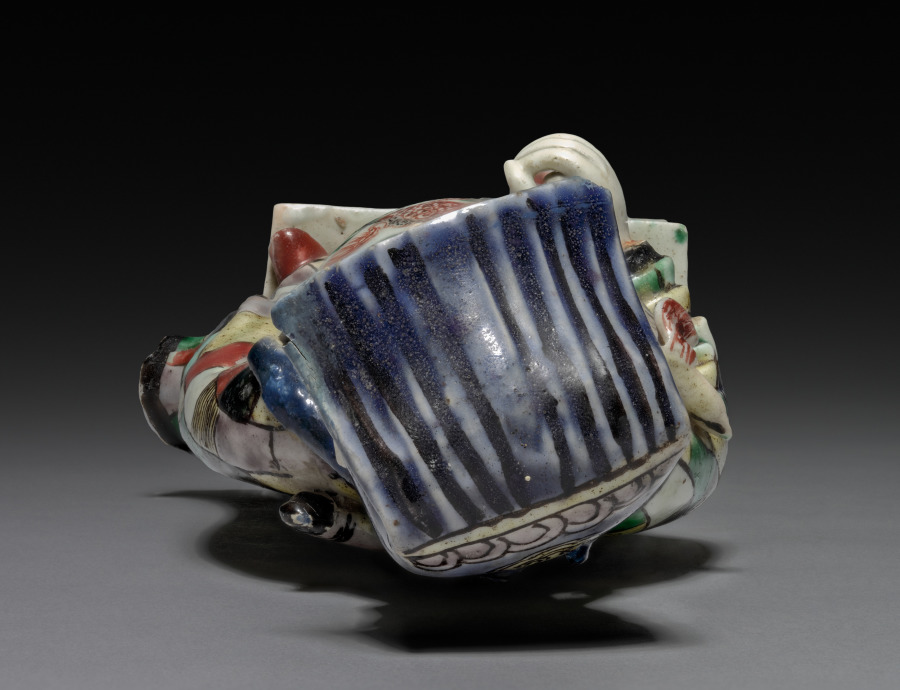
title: Daoist Immortal Zhongli Quan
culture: China, Jiangxi province, Jingdezhen kilns, Qing dynasty (1644-1911), Kangxi reign (1662-1722)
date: 1662–1722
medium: porcelain with famille verte overglaze enamel decoration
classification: Ceramic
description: This porcelain figure represents Zhongli Quan as a scholar. He is wearing a scholar’s hat and carries a scroll on his back. He holds a fan that, according to legend, could bring the dead to life. Thus, he also bears the auspicious meaning of longevity. On his bare belly, the potter painted a qilin, a mythical auspicious creature that turns his head to the sun. The same design in different colors also decorates his back.